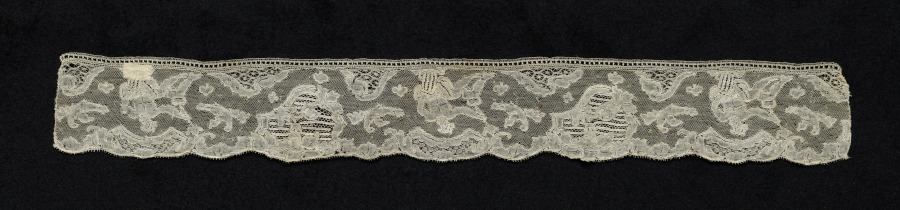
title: Lace Collar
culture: Belgium, Mechelen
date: 1700s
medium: Linen: bobbin lace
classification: Lace